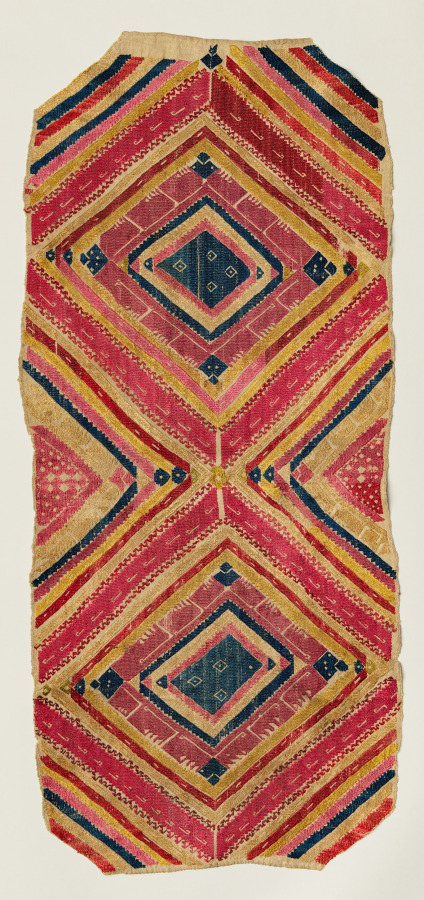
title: Fragment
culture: Africa, North Africa, Morocco, Moroccan embroiderer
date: 1600s-1700s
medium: Silk, linen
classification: Embroidery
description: This textile fragment, possibly made from linen, is densely embroidered with silk threads in various shades of pink, red, yellow, and blue. The design is organized as a series of nested squared and some of the bands are patterned with repeating designs that somewhat resemble letters of the Arabic alphabet. The artist didn't use silk thread to make these, but instead stitched around the desired shapes. The letter-like patterns are thus actually parts of the plain base fabric showing through.